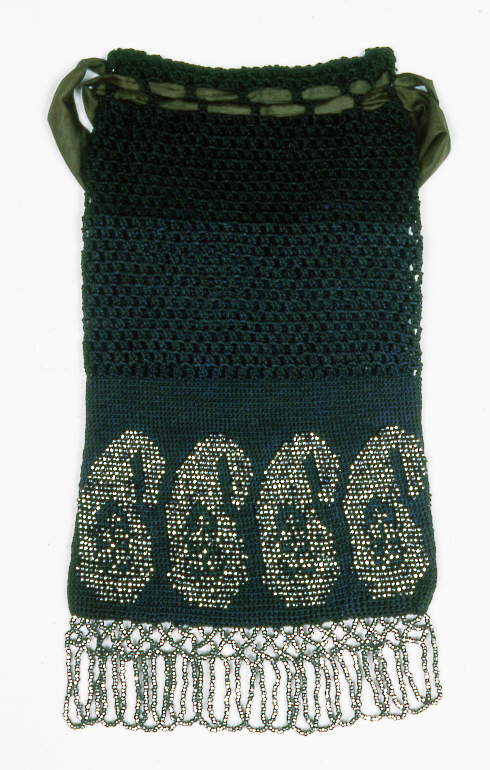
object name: Costume and Accessories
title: Bag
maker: United States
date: c. 1840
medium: Silk, double crochet stitch with metal beads and areas of openwork formed by double and treble crochet stitch combinations; ribbon drawstring: silk, plain weave; beaded loop fringe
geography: United States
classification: textile; bag - needlework; costume accessory - bag; costume accessory; costume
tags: fashion